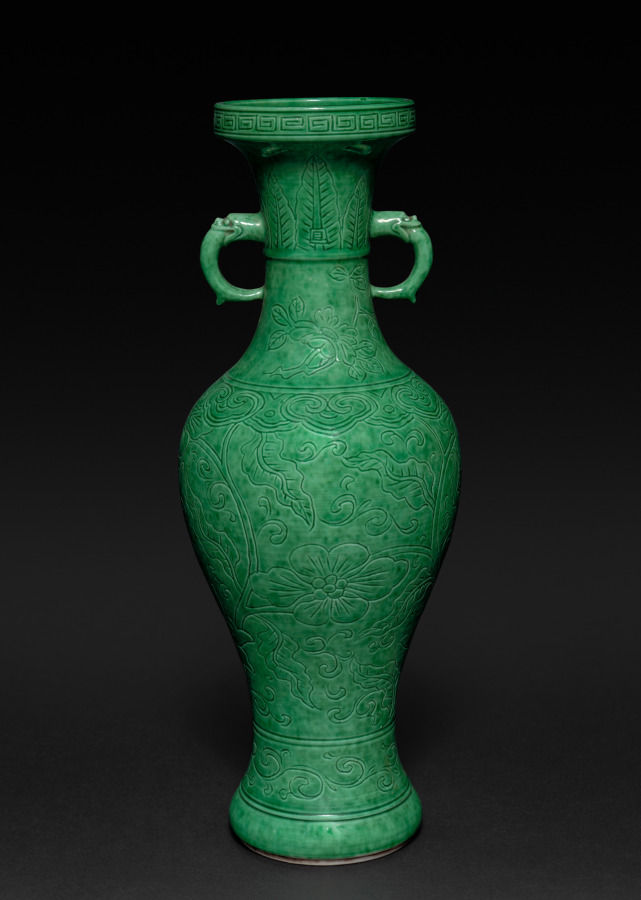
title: Vase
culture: China, Jiangxi province, Jingdezhen kilns, Qing dynasty (1644-1911), Kangxi reign (1662-1722)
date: 1662–1722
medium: glazed white porcelain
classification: Ceramic